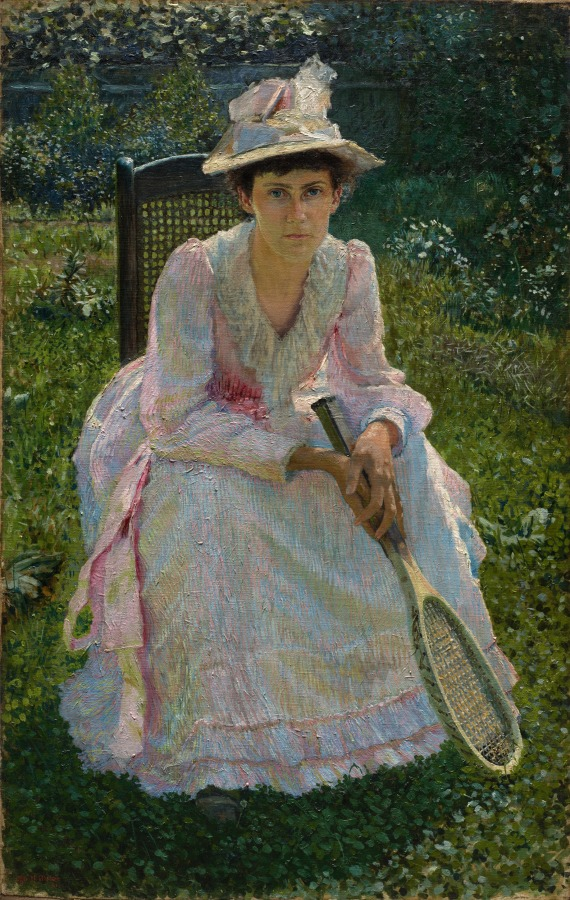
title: Mary Holland Bacher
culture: America, Ohio, Cleveland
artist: Otto H. Bacher (American, 1856–1909)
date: 1891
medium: oil on canvas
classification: Painting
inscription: signed lower left: Otto H. Bacher. / --91.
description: Bacher was the first artist from Cleveland to achieve international renown, and this portrait of his wife exemplifies the Impressionist style he adopted after studying in Paris during the late 1880s. The painting’s unusual subject testifies to the emergence of tennis as one of the few sports of the era in which women could participate without being considered inappropriately masculine or uncouth.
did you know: As a child, Otto Bacher liked to sketch shipping activities around Cleveland's port.